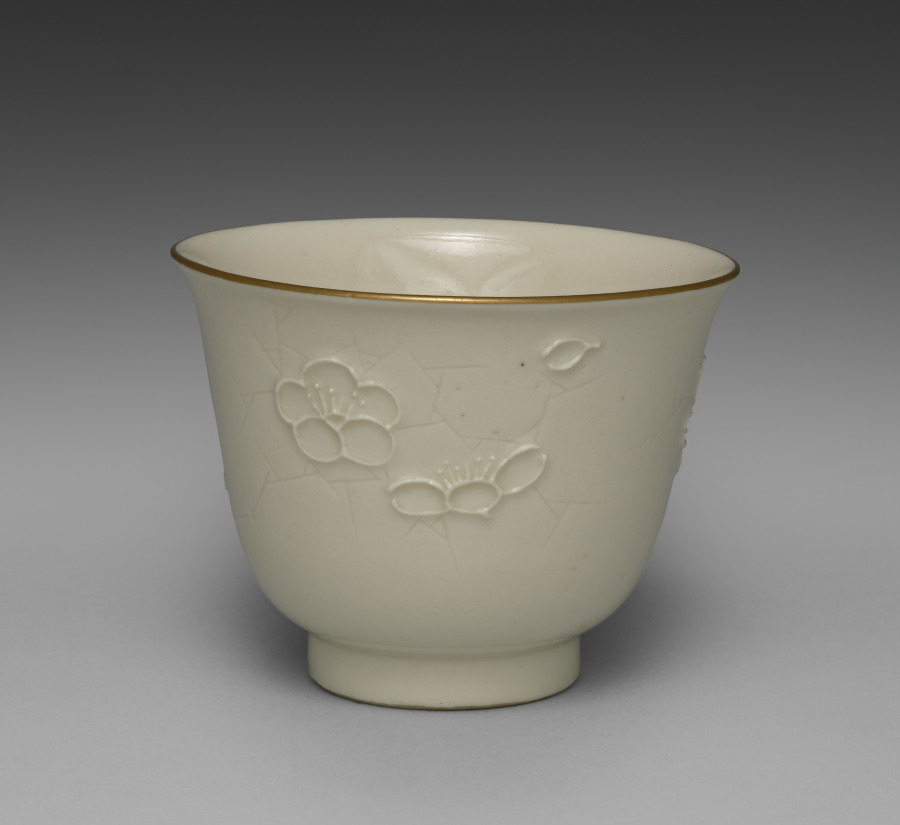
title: Drinking Cup from Dining Set with Plum Blossoms and Cracked-Ice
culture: Japan, Meiji period (1868–1912)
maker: Seifū Yohei II (Japanese, 1844–1878)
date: c. 1875–78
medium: Porcelain with molded designs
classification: Ceramic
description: Each item in this set has a delicate low-relief design of flowering plum branches over scattered, intersecting lines meant to resemble the cracked-ice surface of a frozen body of water and is signed on the base in gold pigment. While Yohei II produced many fine works in underglaze blue, like those produced by Kiyomizu Shichibei, he also made works in quite different styles later in his career, from the early 1870 s. In 1873, he was appointed purveyor to the Industrial Center of Kyoto Prefecture, a designation associated with Kyoto’s efforts to reach an international market through the port of Kobe; and from 1875 until his death, he was involved in national-level projects to present Japanese ceramics across the world. It was during this period that Yohei III was apprenticed to Yohei II, and it has been suggested that this set may in fact be an early example of Yohei III’s work, which he signed with his teacher’s name. Decorated with flowers resembling Japanese textile motifs, the set calls to mind the design of Yohei II’s pair of vases with plum blossoms in the Victoria and Albert Museum. Here, the elaborate trees created for a formal public exhibition setting have been translated into the approachable blossoms of the genteel domestic environment. While the designs are consistent across the pieces, each raised flower petal and pistil and each incised line in the ice was done by hand, so the cups, bowls, and dishes are similar yet unique. The bottoms of two boxes once identified the set’s owner, but the information has been deliberately obscured with black ink. However, inscriptions still visible appear to indicate two occasions, once at the end of July 1886 , and once again in June 1916 , when parts of the set were requested from Hokura in Niigata Prefecture. The location corresponds to a neighborhood in the present-day city of Jōetsu. The surname Tsuji 辻 also appears on a paper tag affixed to one of the box cloths. Future research may possibly reveal more about their provenance. A vase by Yohei III in a private collection combines the formal grandeur of the Yohei II vases in the Victoria and Albert Museum with the gentler design of this dining set, placing flowering plum trees against soft, scalloped-edge clouds resembling those in golden screens.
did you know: The dining wares have a creamy white coloration that the four boxes containing them identify as Korean in style.